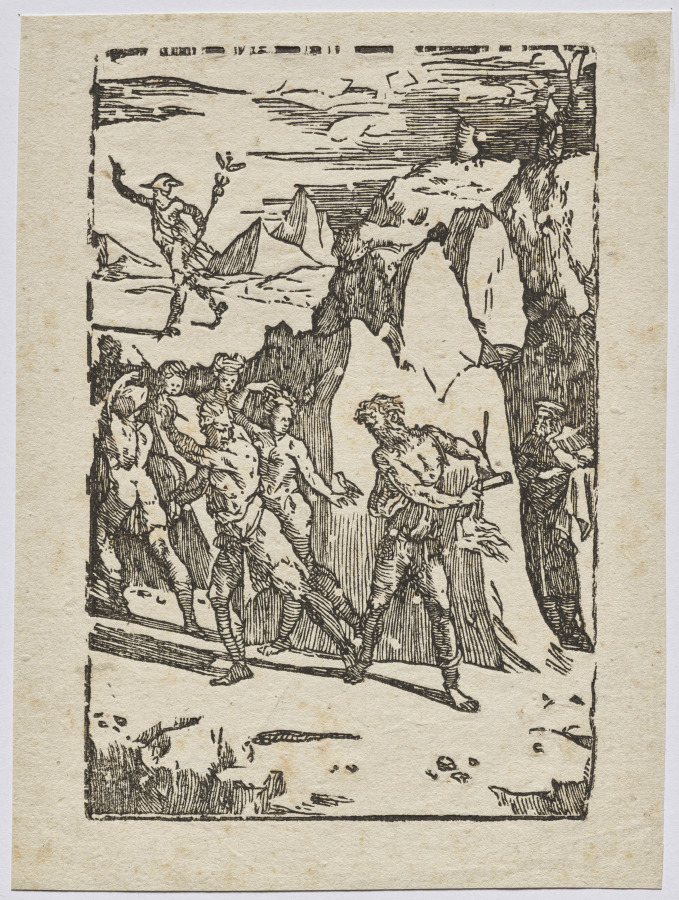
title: The Alchemical Properties of Metal: Mercury, Vulcan, and the Alchemist in the Cave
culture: Italy, Siena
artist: Domenico Beccafumi (Italian, 1486–1551)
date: 1530s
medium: woodcut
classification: Print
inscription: Verso: 2 unidentified collector's marks